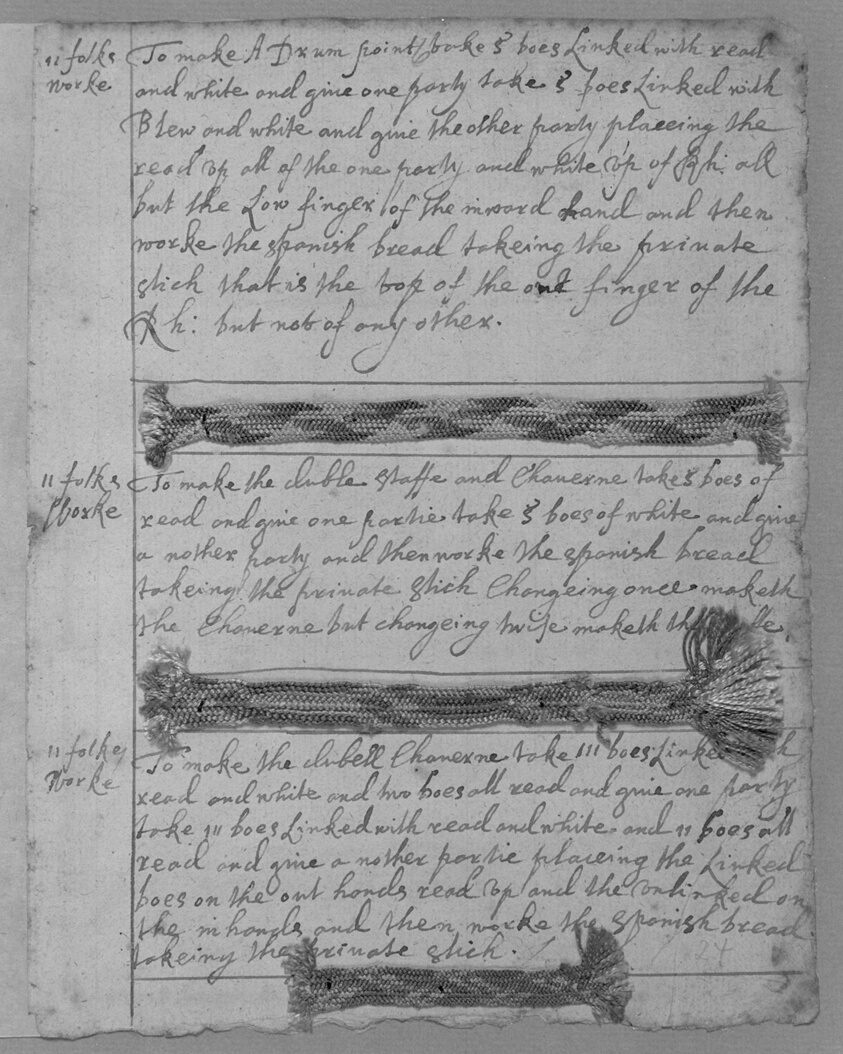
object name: Book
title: Book of Silk Braids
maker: England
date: 1601/50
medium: Paper with sepia ink; silk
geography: England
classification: textile; book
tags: fashion